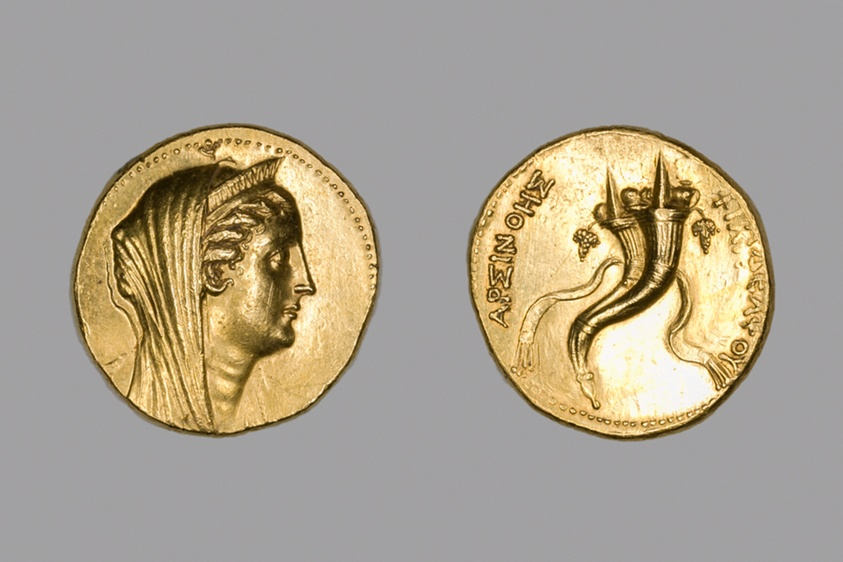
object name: Coin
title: Octadrachm (Coin) Portraying Queen Arsinoe II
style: ptolemaic, greco-roman (egyptian), ancient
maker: Greek, Ptolemaic; probably minted in Alexandria, Egypt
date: After 270 BCE, issued by King Ptolemy II or III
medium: Gold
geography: Alexandria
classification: coin; ancient art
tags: portraits